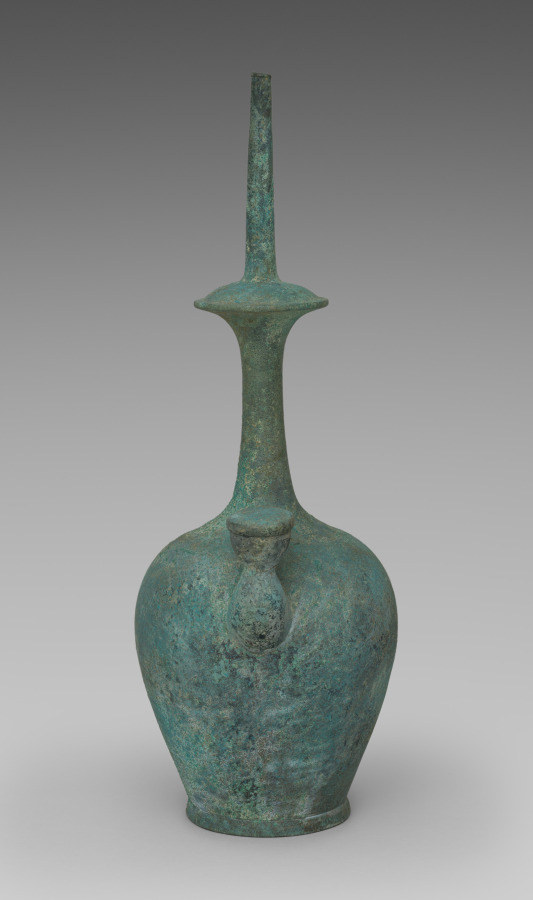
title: Water Ewer for Rituals (Kundika)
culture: Korea, Goryeo dynasty (918–1392)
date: 1100s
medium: bronze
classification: Metalwork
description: Known as kundika in Sanskrit, this distinctively shaped vessel served to purify a sacred space and to invoke a deity. In Korean Buddhist art, it appears primarily as an attribute of the Bodhisattva Avalokitesvara (Gwaneum in Korean). By the 1100s, however, the kundika was used as aristocrats’ fancy water container for everyday use.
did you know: This distinctively shaped vessel is called a kundika in Sanskrit, simply referring to a water bottle.